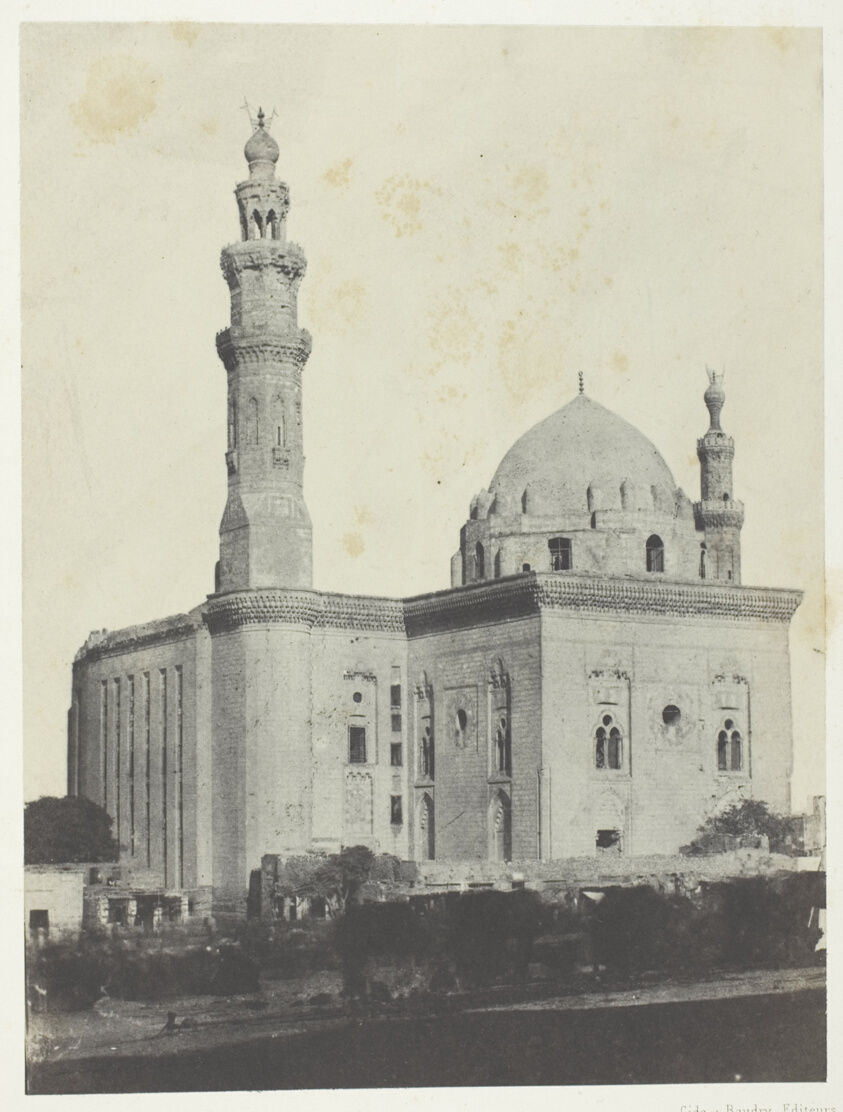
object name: Photograph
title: Mosquée de Sultan Haçan, Le Kaire, plate 5 from the album "Egypte, Nubie, Palestine et Syrie" (1852)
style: 19th century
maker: Maxime Du Camp (French, 1822–1894)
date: 1849/51, printed 1852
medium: Salted paper print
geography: France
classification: salted paper print; photographic process; photography; photograph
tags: Collected by Hugh Edwards, Egypte, Nubie, Palestine et Syrie